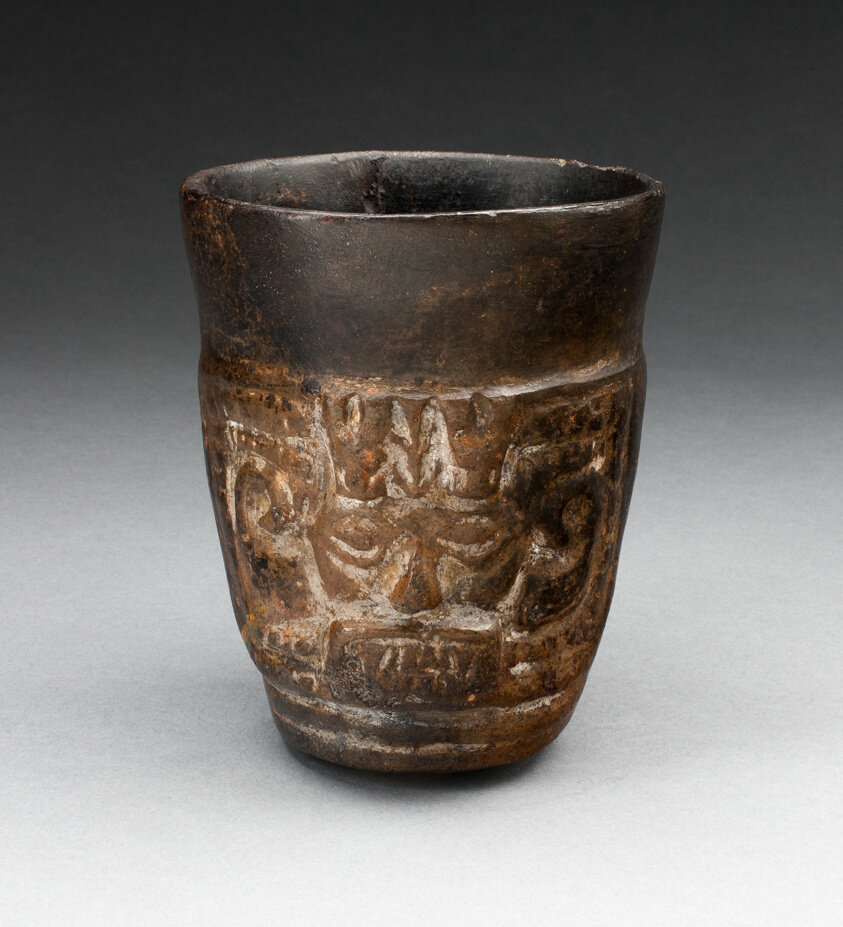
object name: Vessel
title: Blackware Cup with Abstract Faces Carved in Panels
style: tiahuanaco, middle horizon, Pre-Columbian, americas, lambayeque, late intermediate period, Arts of the Americas, andean, andes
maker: Lambayeque (North coast, Peru)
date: 1000–1476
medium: Ceramic and pigment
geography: Peruvian North Coast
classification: blackware (black basaltes); earthenware; ceramics; vessel; art of the americas